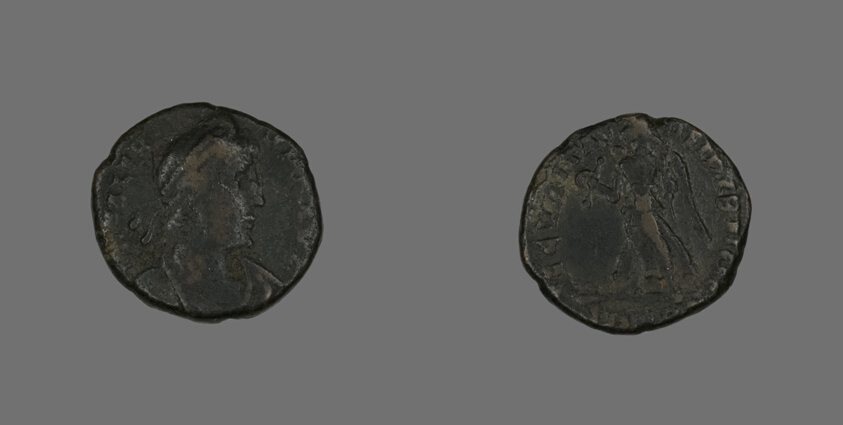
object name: Coin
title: Coin Portraying Emperor Valens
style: roman (ancient, style or period), ancient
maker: Roman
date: 364-378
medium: Silver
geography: Roman Empire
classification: coin; ancient art